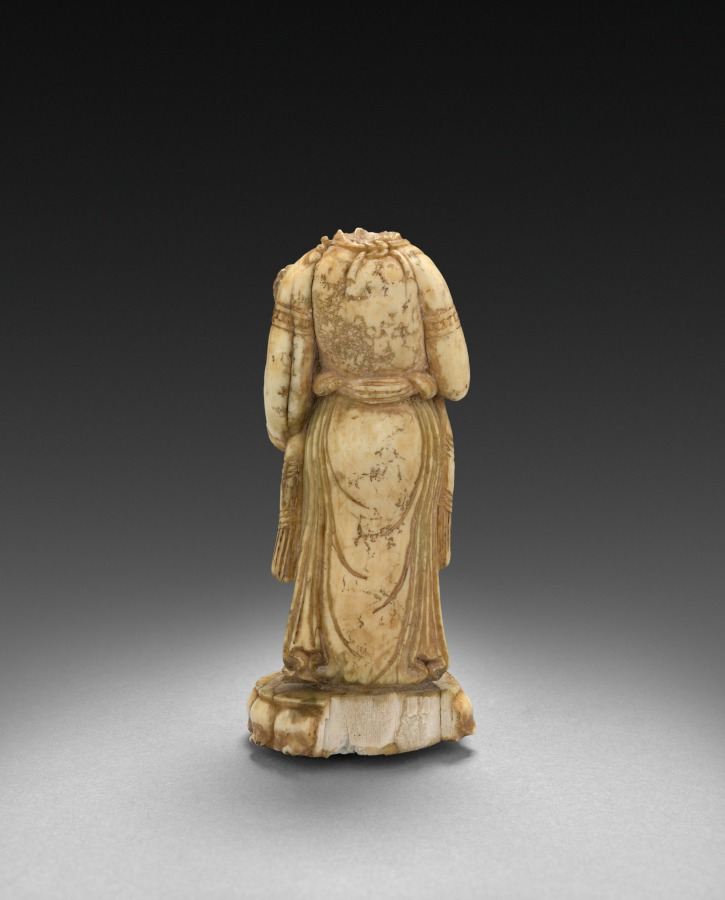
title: Hariti Statuette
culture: China, Tang dynasty (618–907)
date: 618–907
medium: ivory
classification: Sculpture